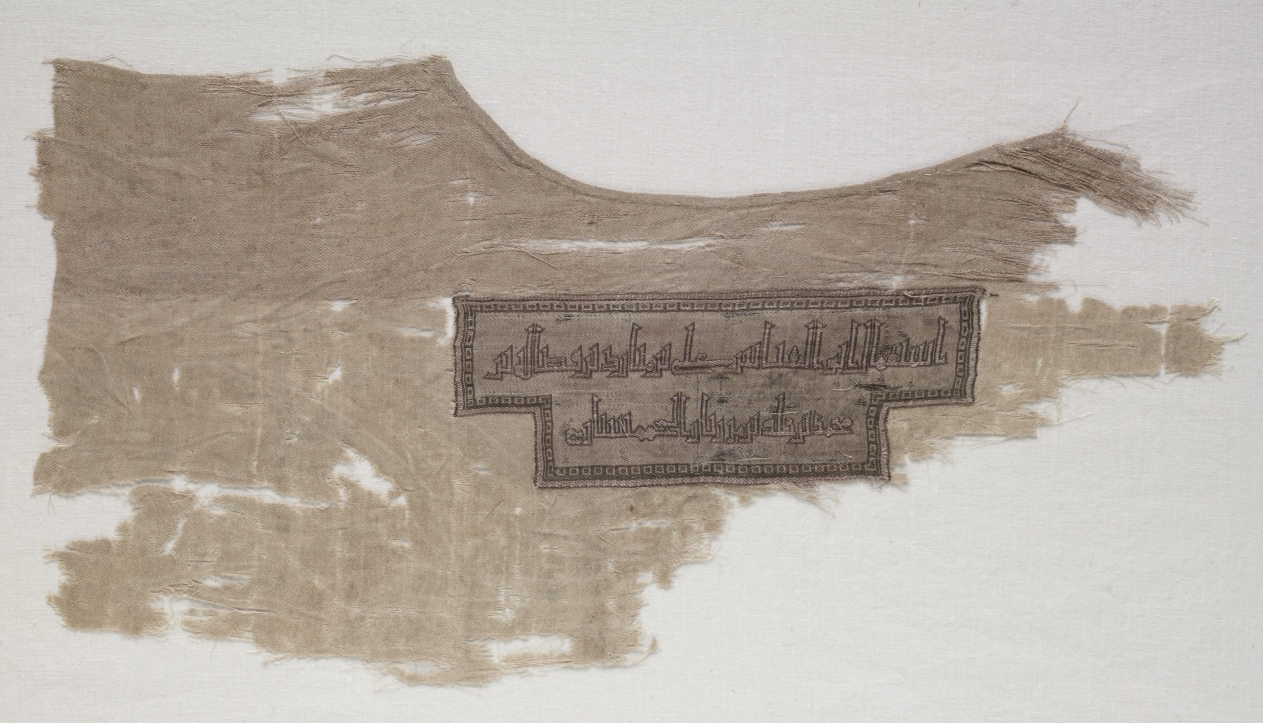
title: Fragment from a Garment: Neck Edge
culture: Iran or Iraq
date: 1900s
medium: Silk: lampas weave, brocaded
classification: Textile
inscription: Centered below the neckline is a T-shaped cartouche bordered with a block motif and enclosing two lines of inscription: 1) "[For] the use of Abu al-'Abbas 'Ali bin Mubarak bin Fudalah bin" and 2) "Muhammad bin Khalaf bin Marzuban al Jahshiyari."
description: This fragment with an inscription was the neck edge of a garment.